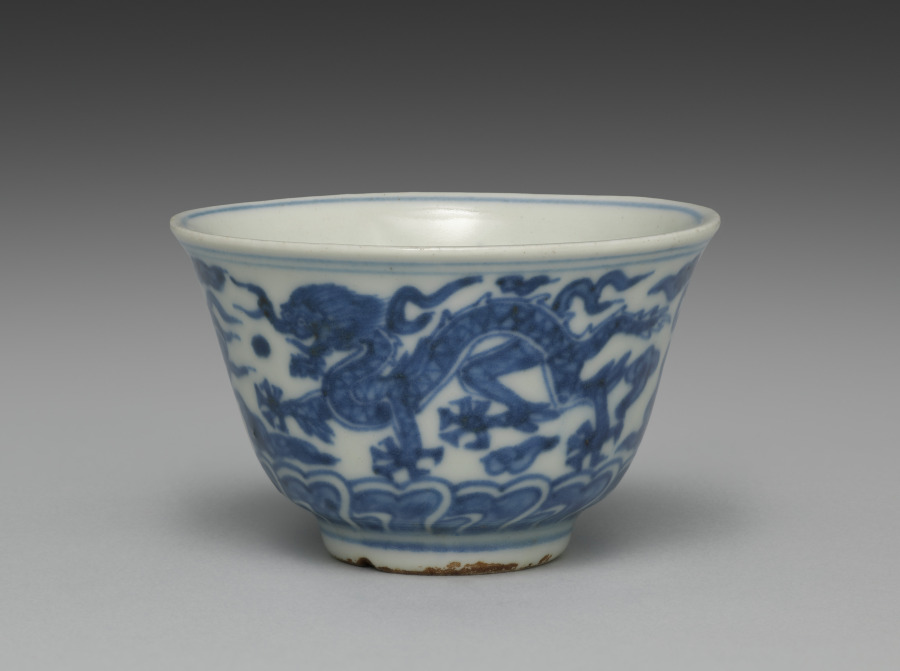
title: Cup from Tea Cups with Dragons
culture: Japan, Edo period (1615–1868)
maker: Seifū Yohei I (Japanese, 1801–1861)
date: 1840s–57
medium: One from a set of five tea cups; porcelain with underglaze blue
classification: Ceramic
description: Seifū Yohei I made both blue and white porcelains after Ming dynasty (1368–1644) Chinese wares fired in the kilns at Jingdezhen for export. He also made colorful stoneware in the style of his teacher, Nin’ami Dōhachi (Takahashi Dōhachi II) (1783–1855).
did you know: A small figure of an elephant serves as the handle for the lid.